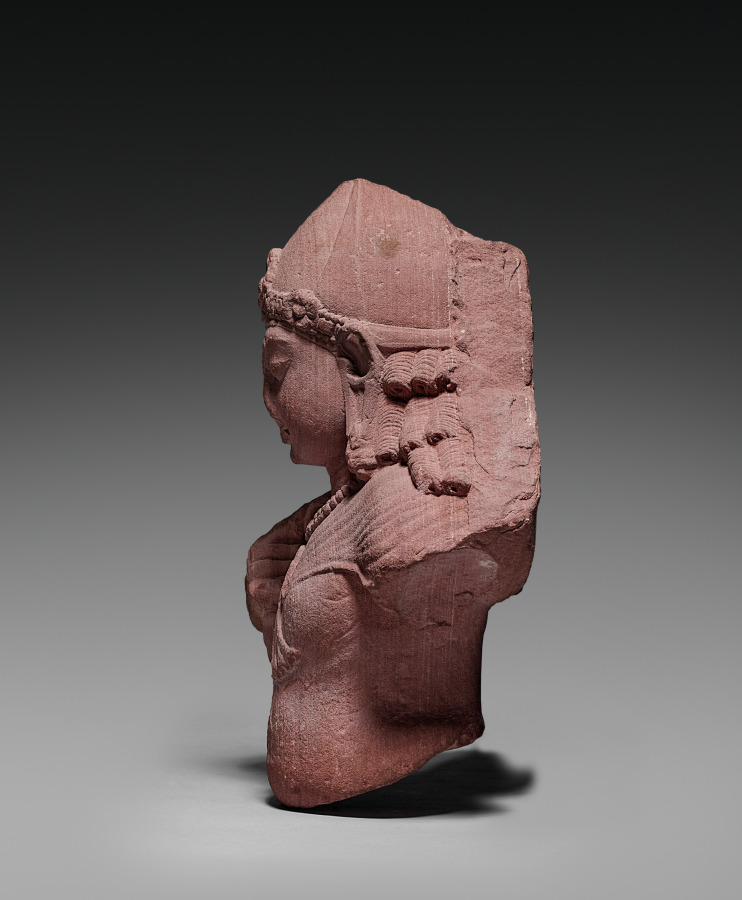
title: Attendant of Surya, the Sun God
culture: India, Mathura, Gupta Period (320-647)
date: 320–650 CE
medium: sandstone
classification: Sculpture